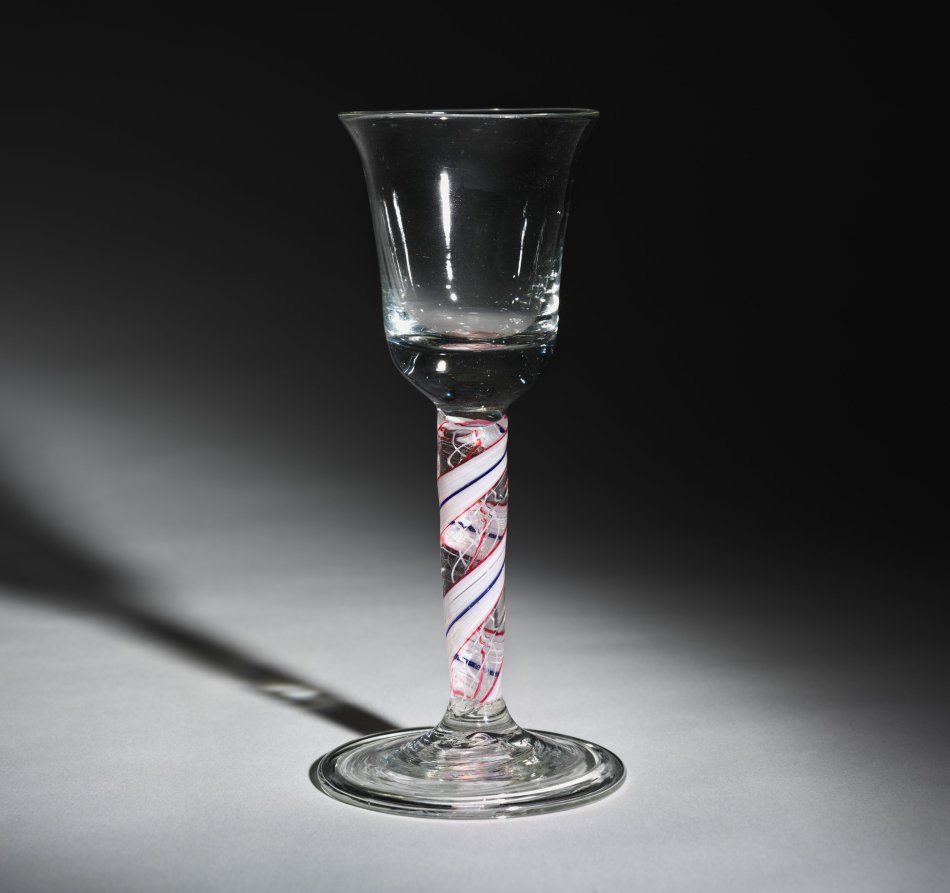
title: Goblet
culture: England, 18th century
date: c. 1725–1750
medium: glass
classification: Glass